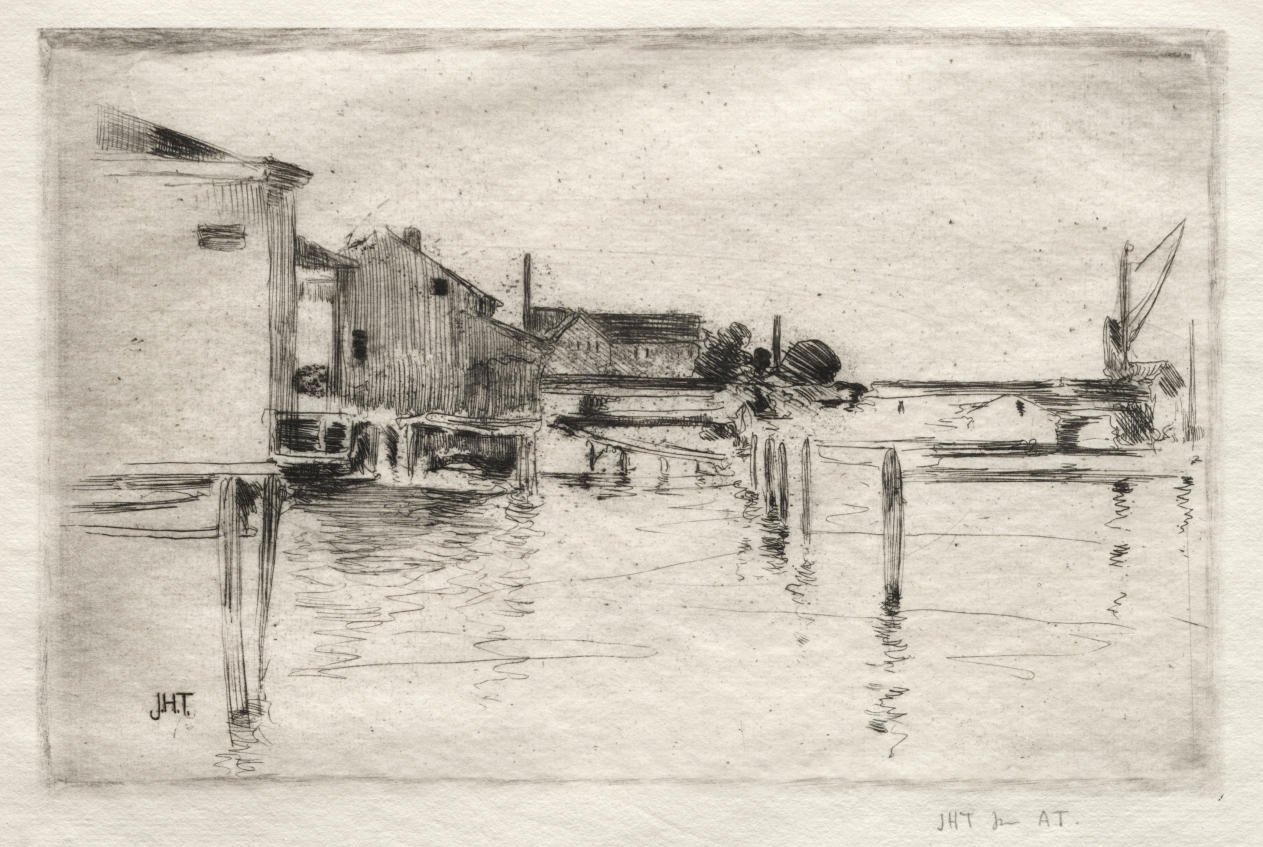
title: The Dock, Bridgeport, Connecticut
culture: America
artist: John Henry Twachtman (American, 1853–1902)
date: c. 1889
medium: etching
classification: Print